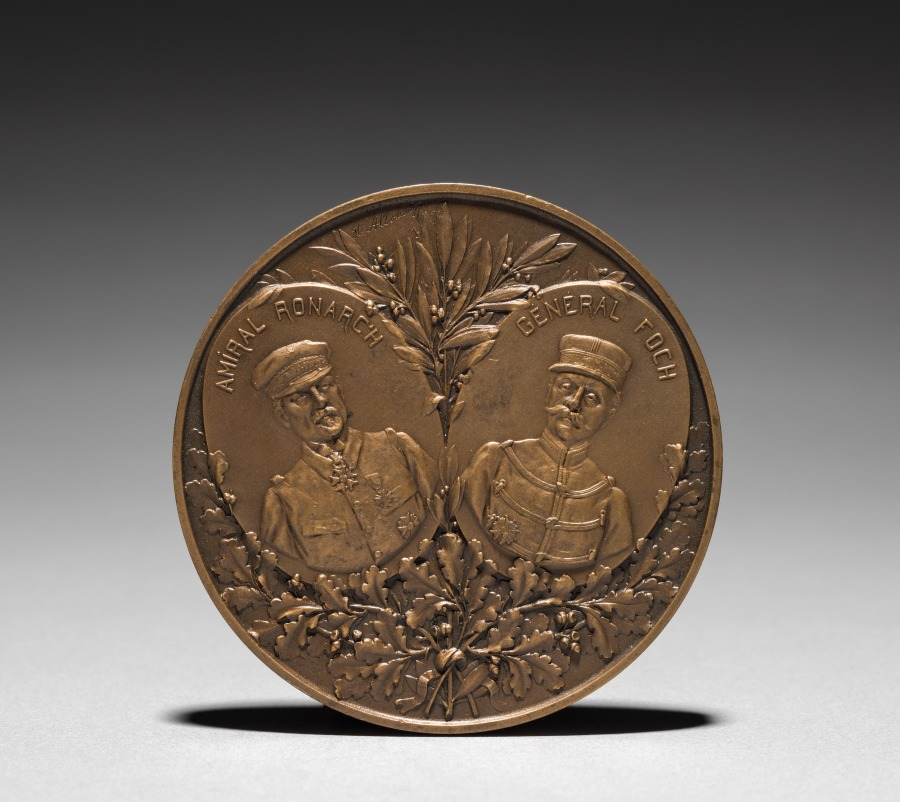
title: Medallion (reverse)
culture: France, 19th-20th century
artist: Henri Emile Allouard (French, 1844–1929)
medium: bronze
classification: Metalwork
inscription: "Amiral Ronarch General Foch."